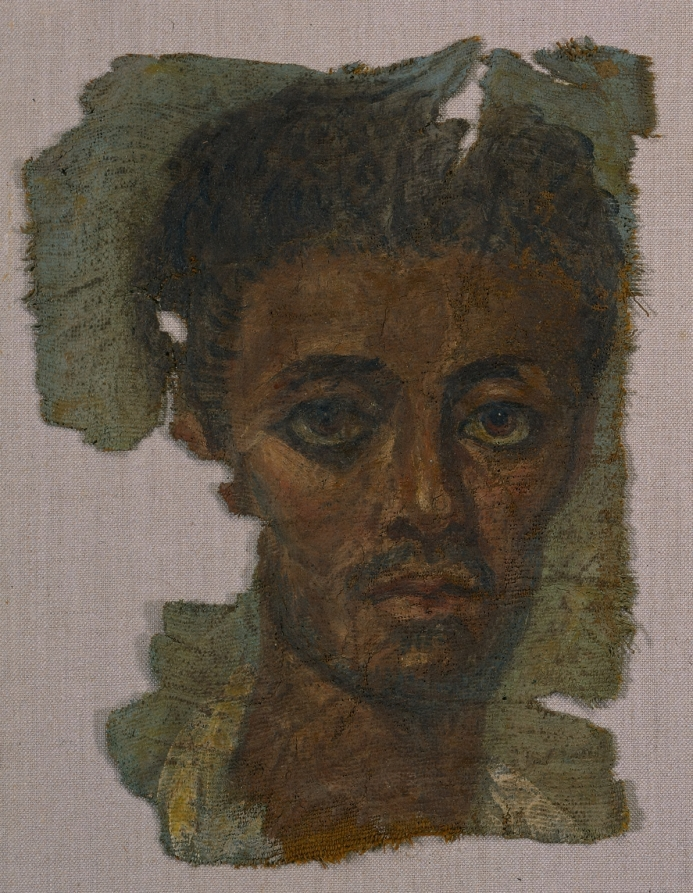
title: Funerary Panel of a Man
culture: Antonine-era Roman Empire (Egypt), unknown painter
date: about 138–92 CE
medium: encaustic on linen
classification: Painting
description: A young man with a slight mustache and warm brown eyes looks at the viewer from this painting. The linen on which his image was rendered was a less popular alternative to wood. Its delicate surface was only workable with brushes, and not the flat metal tools used for details on wooden paintings. The rest of the cartonnage (body case) the man’s image was once part of was painted with ancient Egyptian religious imagery, like that of the young man Artemidorus. The blended decorative forms on the cartonnage show how distinctive Greco-Roman and Egyptian representational systems interacted in Roman-ruled Egypt.